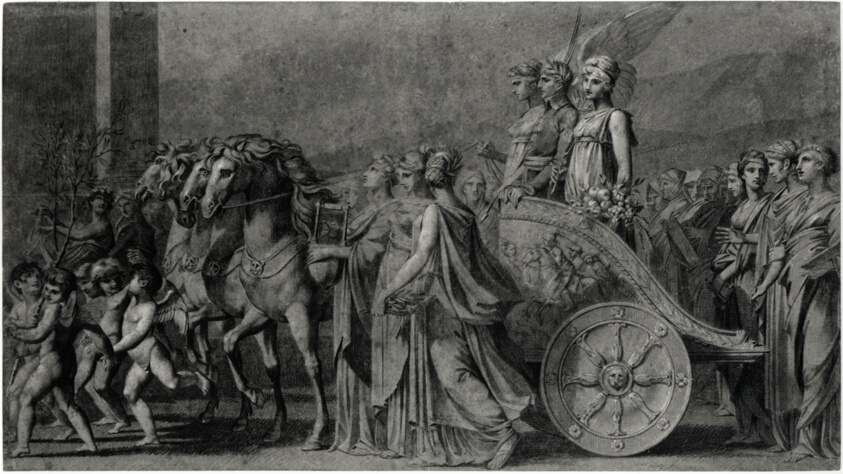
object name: Drawing and Watercolor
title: The Triumph of Bonaparte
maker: Pierre-Paul Prud'hon; French, 1758-1823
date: 1801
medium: Black chalk with stumping, heightened with touches of white chalk, on blue laid paper, laid down on ivory Japanese paper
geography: France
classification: chalk; drawings (visual works); prints and drawing